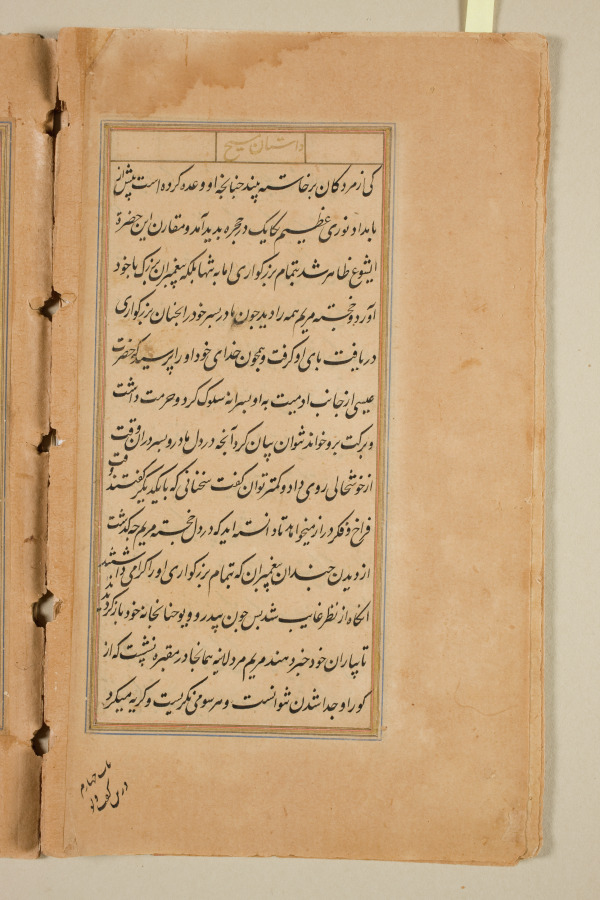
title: Text page from a Mirror of Holiness (Mir’at al-quds) of Father Jerome Xavier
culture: Mughal India, Allahabad, made for Prince Salim (1569–1627)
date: 1602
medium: Ink and gold on paper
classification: Manuscript